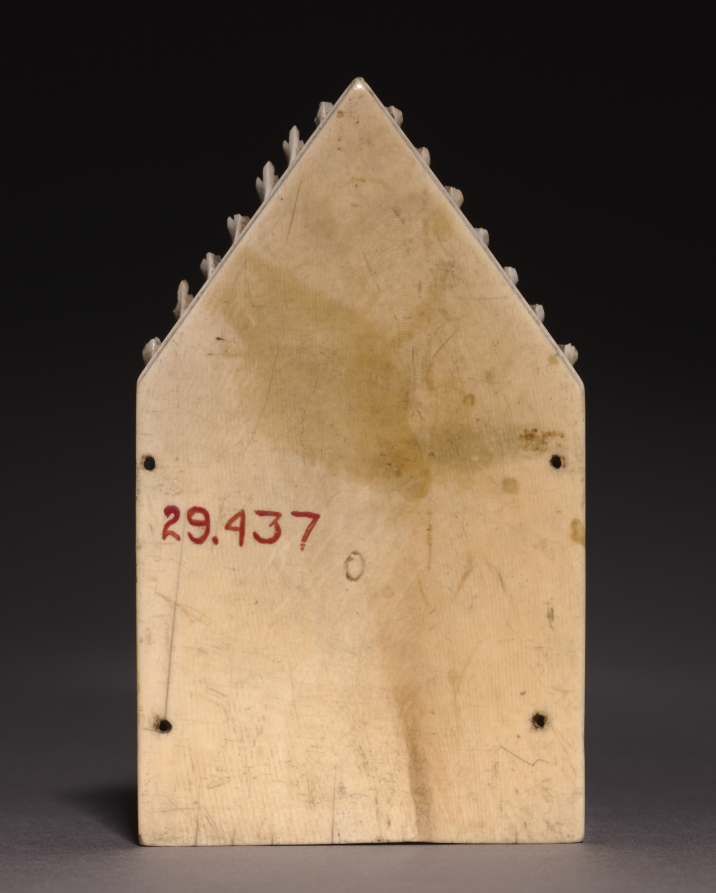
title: Plaque: The Crucifixion and Virgin and Child with Angels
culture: France, Paris?, Gothic period, 13th century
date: c. 1250–70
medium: ivory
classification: Ivory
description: This elegant panel once served as the center of an ivory triptych. Set into an intricate architectural frame that recalls Gothic forms, the figures are carved in three-quarter relief, suggesting free-standing sculptures placed in niches. Below, two standing angels bearing candles flank an elegant Virgin and Child. Above, the crucified Christ is shown tormented by the Roman soldiers Longinus and Stephaton, who flank him on either side.